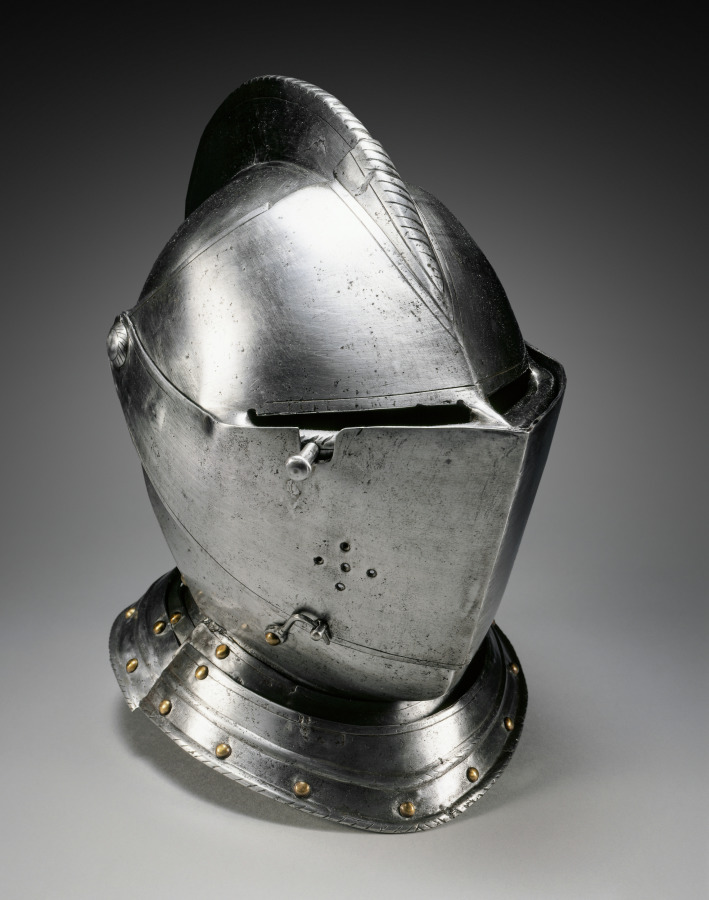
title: Close Helmet for the Field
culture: Germany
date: c.1550–70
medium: iron, steel, leather and brass rivets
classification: Arms and Armor